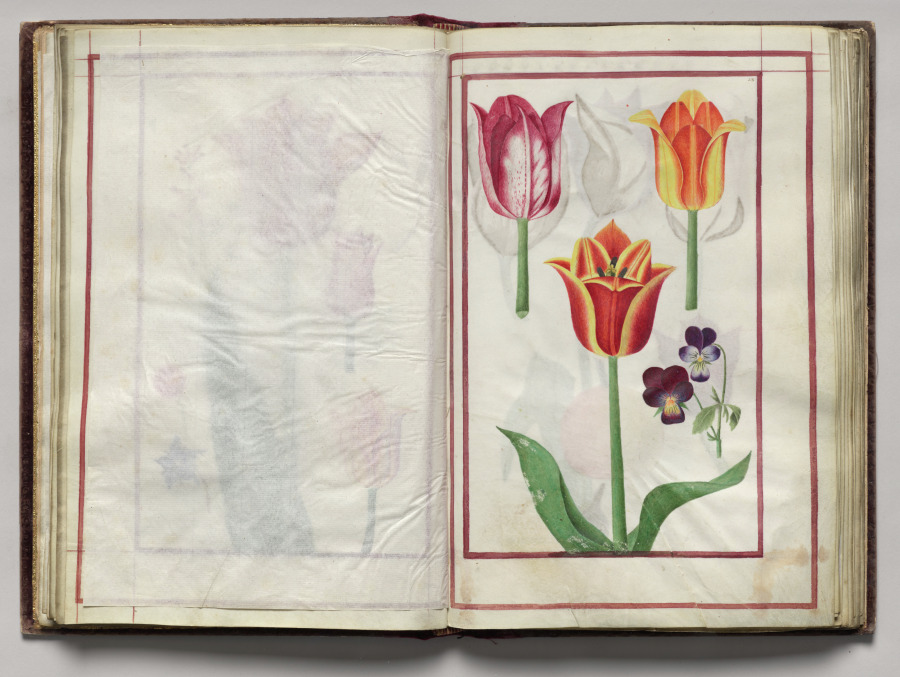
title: Tulips and Violets, folio 14 (recto), from Florilegium (A Book of Flower Studies)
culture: France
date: 1608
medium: watercolor, ink, silver, and gold over occasional traces of pencil, on vellum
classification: Bound Volume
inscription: Dated: Poitiers 1608 (on frontispiece) Signed: On frontispiece in black ink, lower right: Van Kuyk Notation on drawing: Frontispiece: in pencil, lower margin: * élève de Van Kessel, peintre flammand (* in pencil also appears in front of Van Kuyk's name).